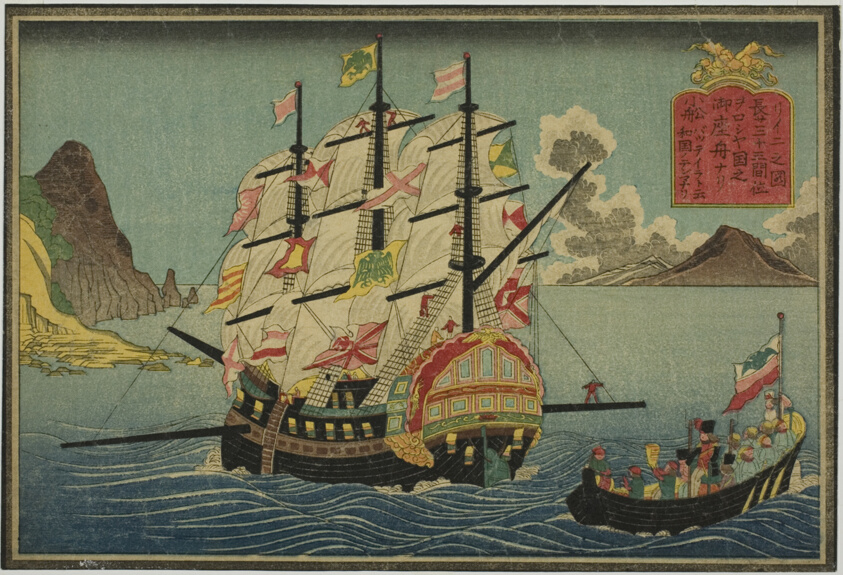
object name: Print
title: Russian Sail Ship, from the set of eight Pictures of Foreign Ships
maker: Unknown Artist (Japanese, date unknown)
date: 1840s–1850s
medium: Color woodblock print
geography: Japan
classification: woodblock print; print; asian art